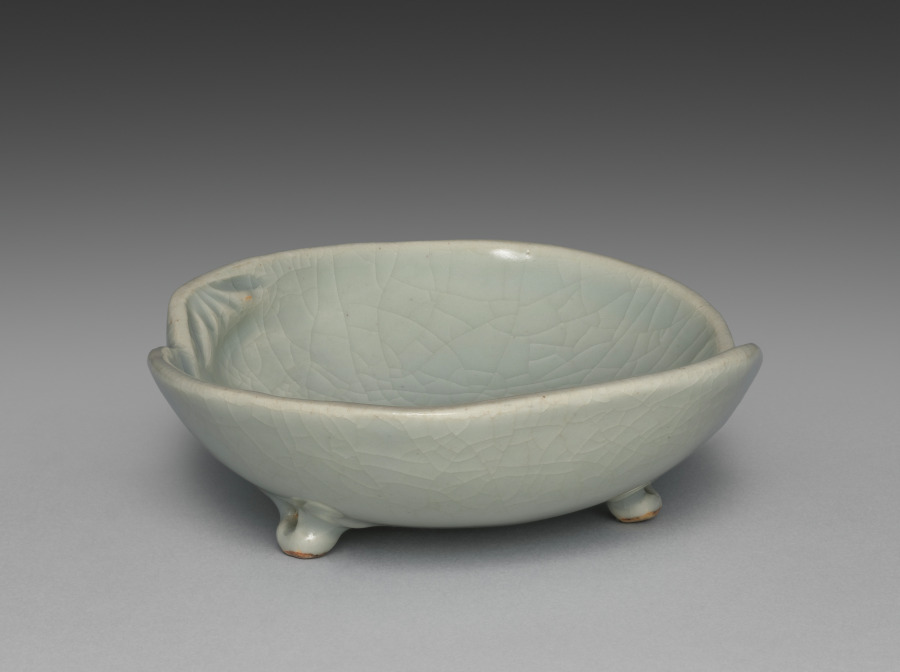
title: Dish from Dishes with Matching Shells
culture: Japan, Meiji period (1868–1912)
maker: Seifū Yohei III (Japanese, 1851–1914)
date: 1893–1914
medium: One of a pair of dishes; porcelain with celadon glaze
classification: Ceramic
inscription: 清風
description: Yohei III’s main output for his sophisticated clientele was in the form of tea sets and dining sets. He created a range of dishes in green glazes. He often produced in pairs, sets of five, or sets of ten. This pair of shell dishes have a box lid interior attestation by Yohei IV that the dishes were made by Yohei III with a cracked-ice (hyōretsu) pattern in the glaze, omitting reference to any glaze coloration.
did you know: These shell-shaped dishes are of the saucer type, suitable for dipping sauces.